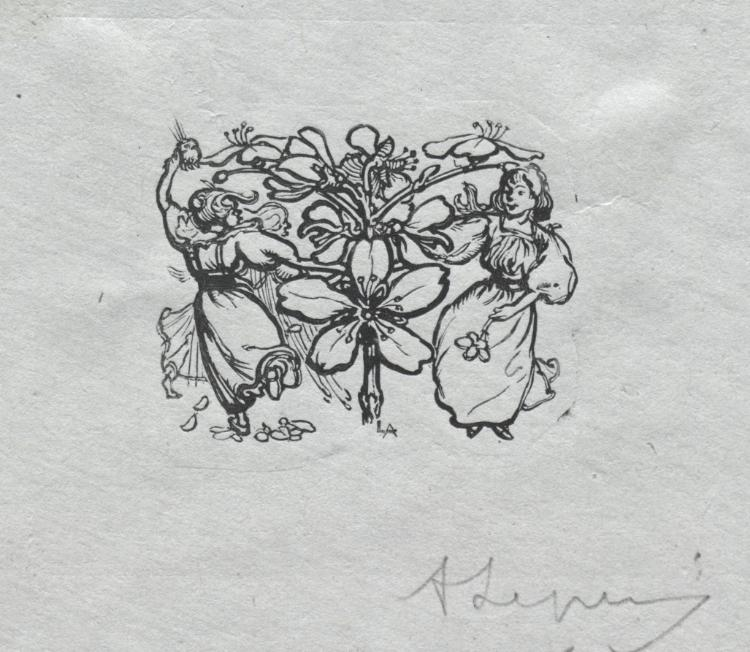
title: Paris Almanac, 1897: Tail-piece, Spring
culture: France, late 19th Century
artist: Auguste Louis Lepère (French, 1849–1918)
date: 1897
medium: wood engraving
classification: Print